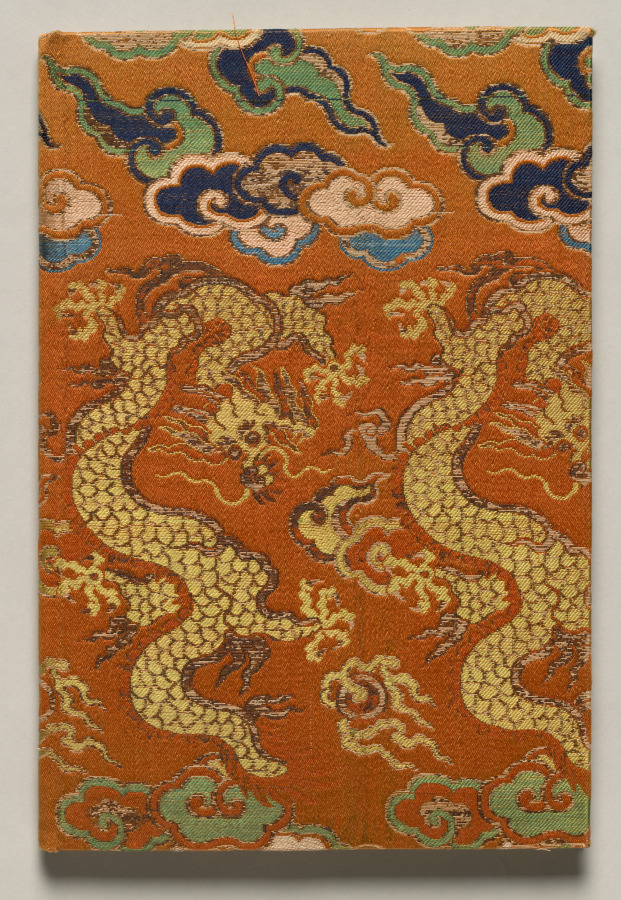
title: Shazanrō Picture Book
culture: Japan, Edo period (1615–1868)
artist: Tani Bunchō (Japanese, 1763–1841)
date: 1816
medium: Woodblock-printed book; ink and color on paper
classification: Bound Volume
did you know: Shazanrō was one of Tani Bunchō's style names.